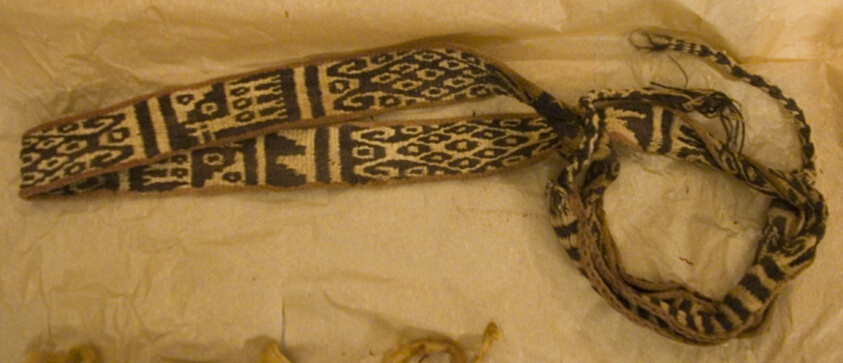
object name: Textile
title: Band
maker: Peru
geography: Peru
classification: textile; weaving